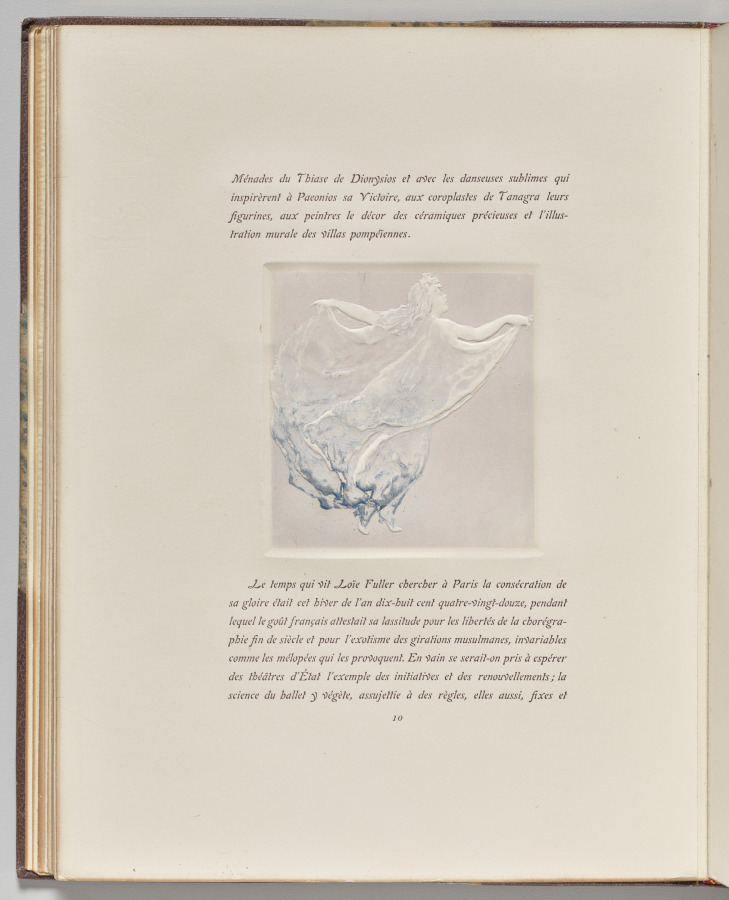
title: Dancing Woman with Arms Spread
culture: France, early 20th Century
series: La Loïe Fuller, by Roger Marx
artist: Pierre Roche (French, 1855–1922)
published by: Les Cents Bibliophiles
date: 1904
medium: gypsograph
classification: Bound Volume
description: Although best known as a sculptor, Roche was a versatile and prolific artist who worked in many mediums. Loïe Fuller, the pioneer of modern dance who took Paris by storm in 1892, was one of his favorite subjects. He portrayed her in clay, bronze, marble, plaster, and in a series of gypsographs that illustrated an essay by the art critic Roger Marx. The book was described as "a precious monument to Loïe Fuller."